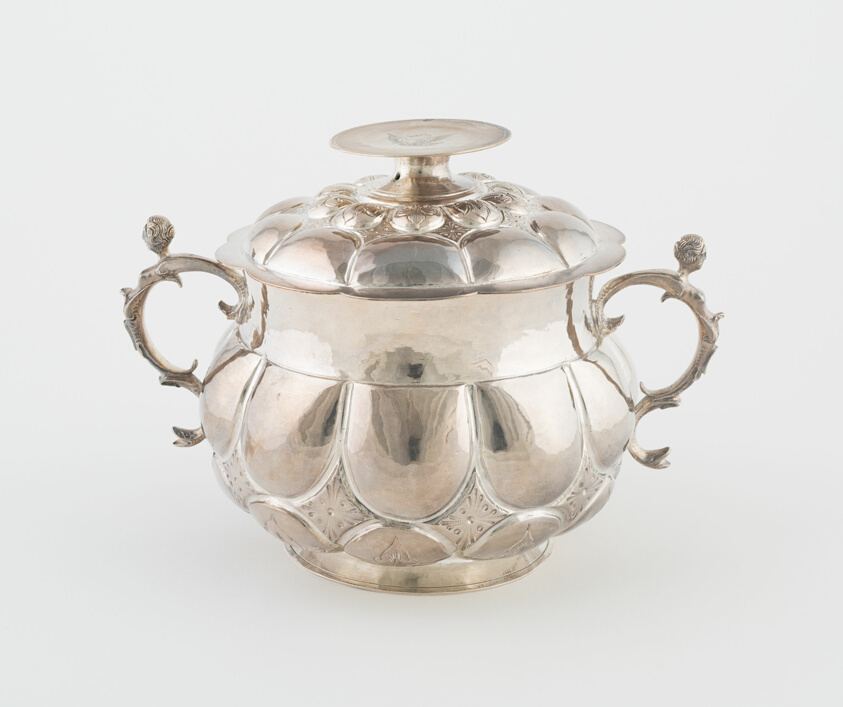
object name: Metalwork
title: Caudle Cup with Cover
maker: Arthur Manwaring; English, active 1643-91; London, England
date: 1659/60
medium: Silver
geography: London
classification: drinking vessel; silver; metalwork; european decorative arts